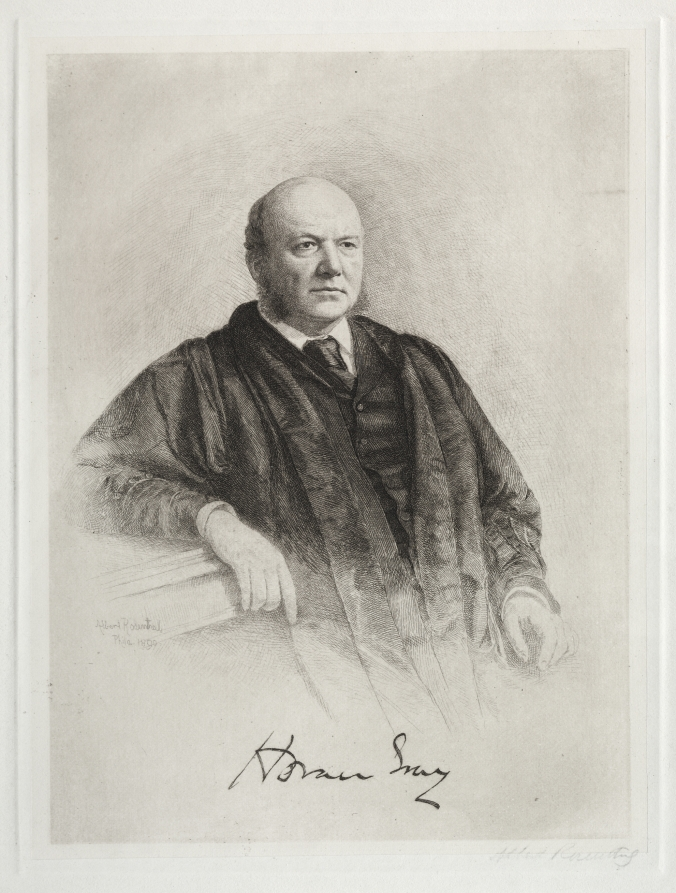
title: Horace Gray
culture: America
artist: Albert Rosenthal (American, 1863–1939)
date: 1890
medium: etching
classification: Print